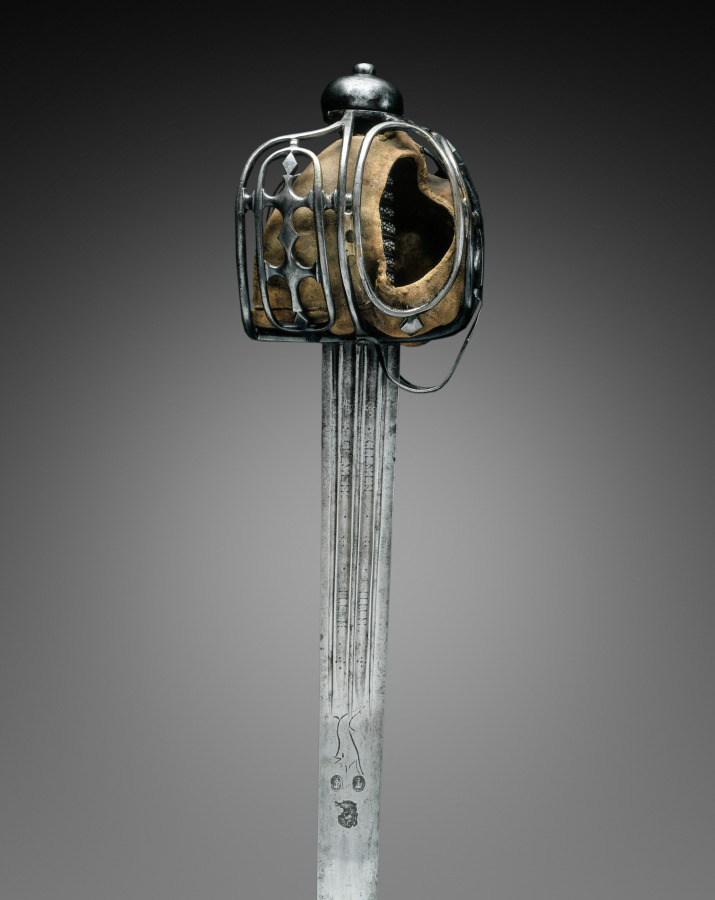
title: Basket-Hilted Broadsword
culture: hilt: Scotland; blade: Germany, Solingen, hilt: 18th Century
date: Hilt: c. 1720, Blade: early 1700s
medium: steel; liner of buff leather; grip of wood, copper wire and fishskin (ray?)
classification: Arms and Armor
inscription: CLEMENS WILLEMS ME FECIT SOLINGEN